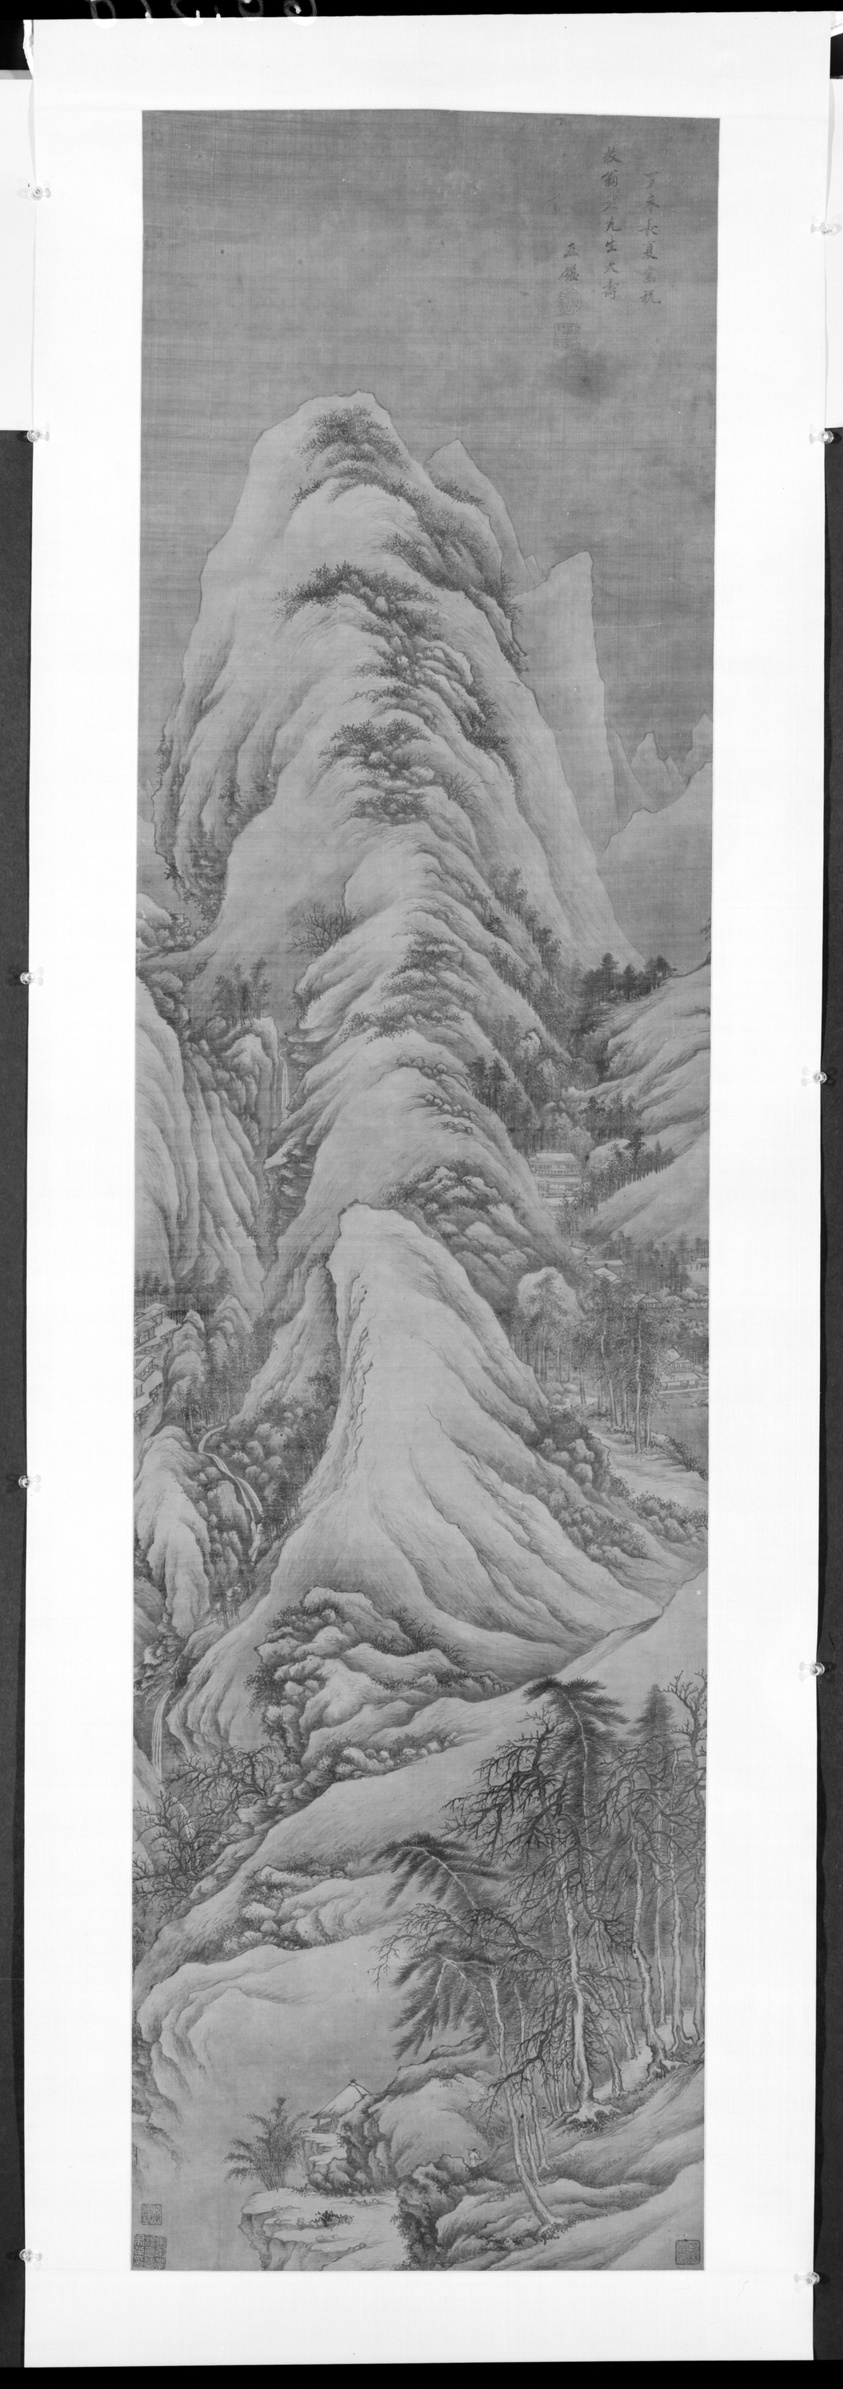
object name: Painting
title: Landscape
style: Chinese (culture or style)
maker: Wang Jian (Chinese, 1598-1677)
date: Qing dynasty (1644–1911), 1598–1677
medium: Hanging scroll; ink and light color on silk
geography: China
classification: hanging scroll; painting; asian art